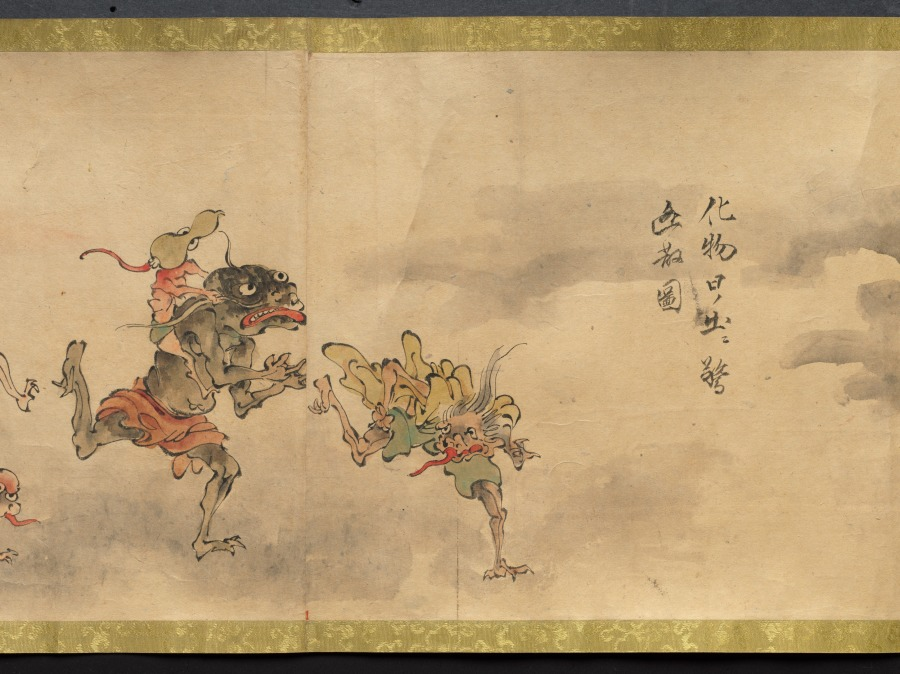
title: An Illustrated Marriage of Apparitions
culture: Japan, Edo period (1615–1868)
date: mid-1800s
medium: handscroll; ink and color on paper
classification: Painting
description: The matchmaking, engagement, wedding, and birth of the first child of two apparitions, or bakemono, literally "things that change," are illustrated in this whimsical, humorous handscroll. Japanese folklore abounds with such strange creatures, most famously represented in handscrolls featuring a procession of 100 supernatural monsters. Aside from a textual preface and cartouches indicating the content of the scenes, the tale is told visually. The artist and whereabouts of the original handscroll are unknown, but a number of other 19th-century copies by amateur painters exist in Japanese collections, attesting to its broad appeal.